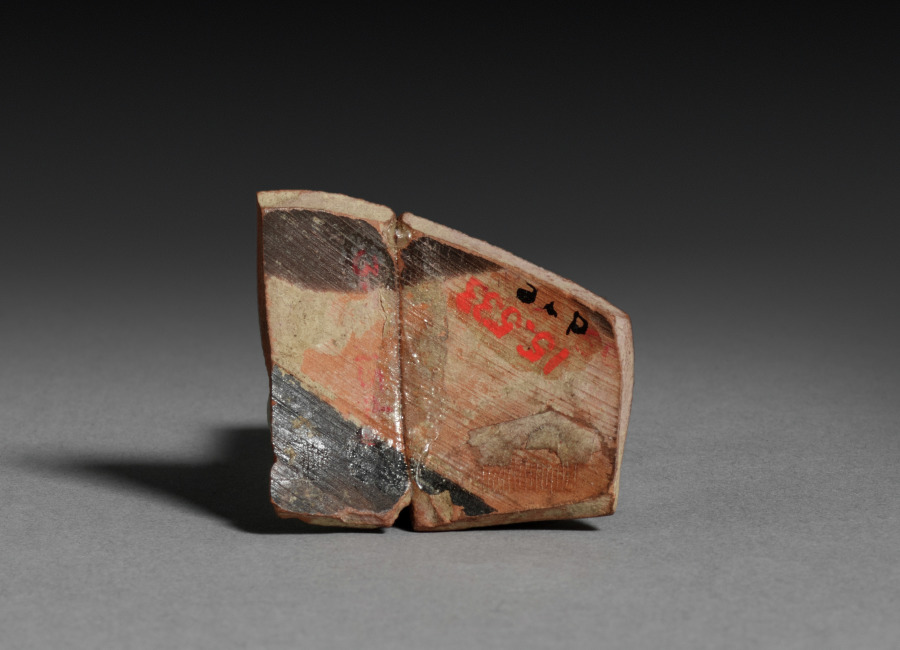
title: Fragment from Red-Figure Oinochoe (Wine Jug) or Hydria (Water Jar): Woman Holding Box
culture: Greek, Attic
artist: attributed to Shuvalov Painter (Greek, Attic, active c. 440–410 BCE)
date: c. 425–420 BCE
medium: ceramic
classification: Ceramic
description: The relatively large eyes and head of this seated woman are characteristic of figures painted by the Shuvalov Painter, a painter known to have painted numerous small vases during the mid- to late fifth century BC. Along with many mythological subjects, the Shuvalov Painter often showed women in domestic settings, as here; the box or chest she holds could be a bridal gift.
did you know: The Shuvalov Painter is named after the former owner of an amphora now in the Hermitage.